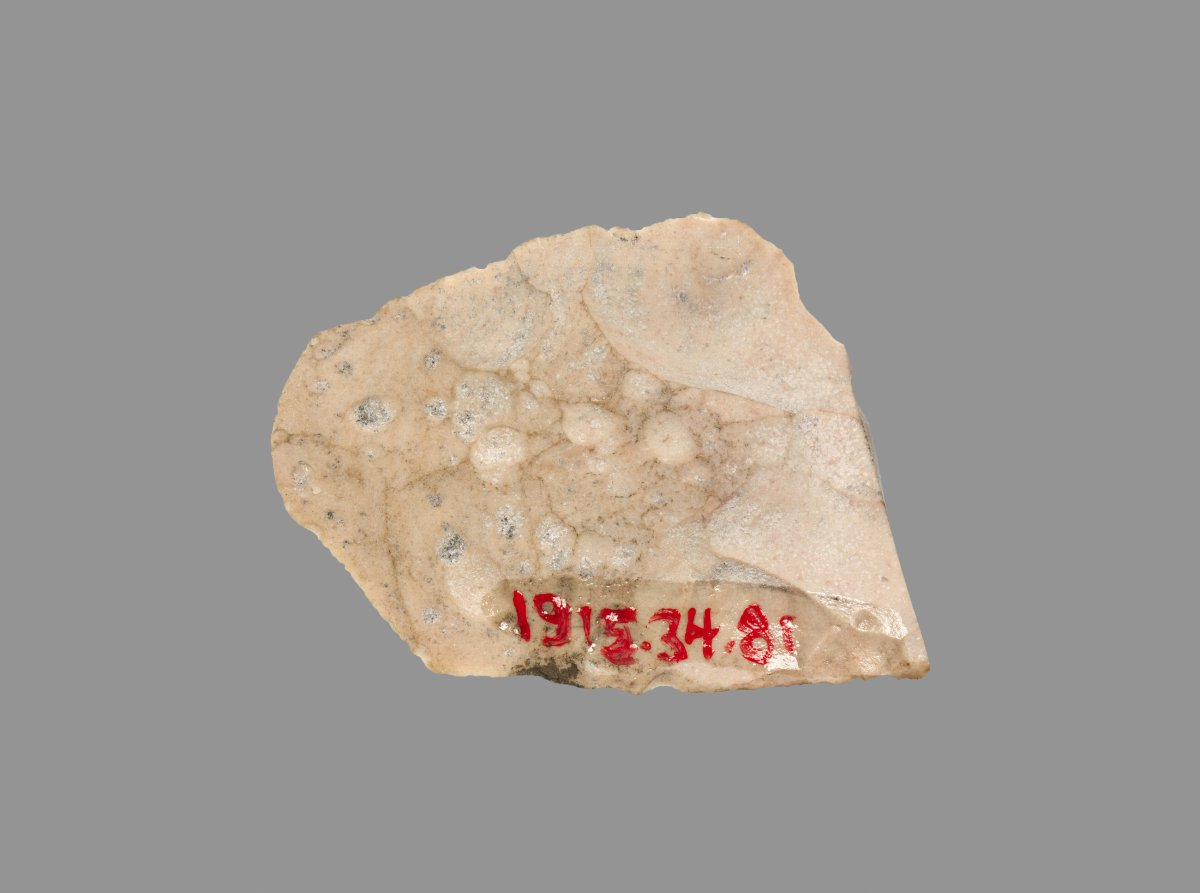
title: Sickle Blade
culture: Egypt, Middle Kingdom (2040–1648 BCE), Dynasty 12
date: 1980–1801 BCE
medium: flint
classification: Implements